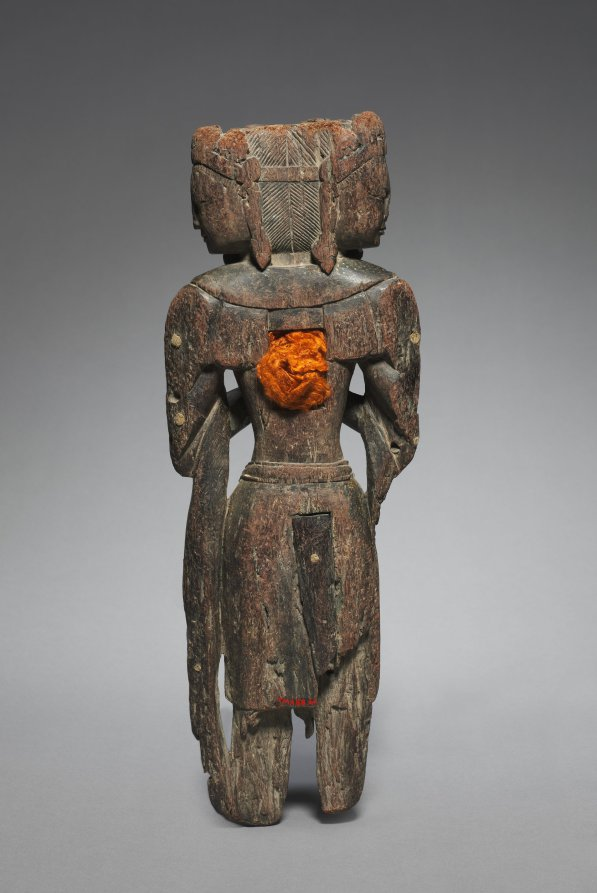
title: Bodhisattva Avalokitesvara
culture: Himalyas, probably Tibet, 10th-12th century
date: 900–1200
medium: wood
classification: Sculpture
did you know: Holes left from wooden pegs indicate the figure originally had more arms and an additional level of heads.